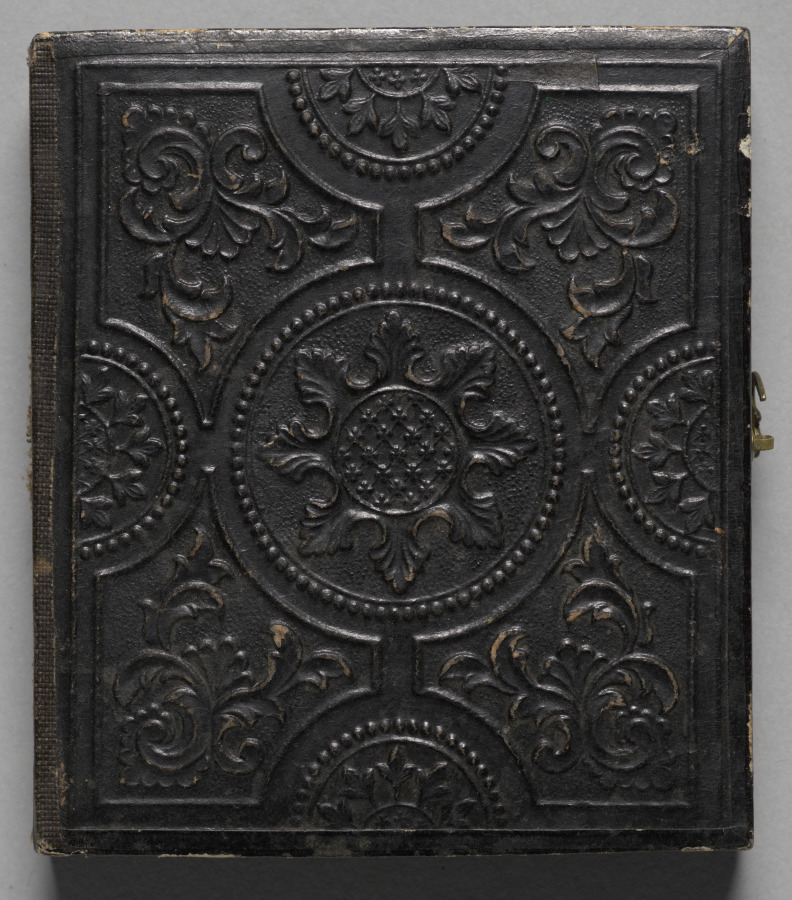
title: Shakespearean Actor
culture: America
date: c. 1858–1862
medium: ambrotype, tinted, sixth plate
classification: Photograph